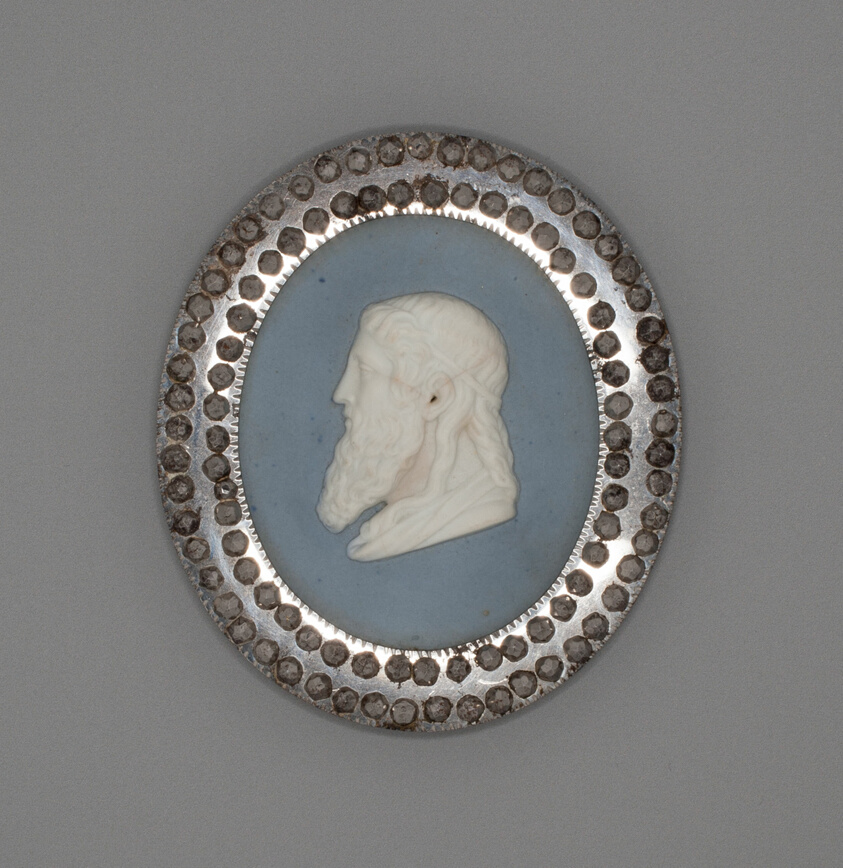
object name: Ceramics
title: Medallion with Plato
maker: Wedgwood Manufactory (England, founded 1759)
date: Late 18th century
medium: Stoneware (jasperware)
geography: Burslem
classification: sculpture; stoneware; european decorative arts; ceramics